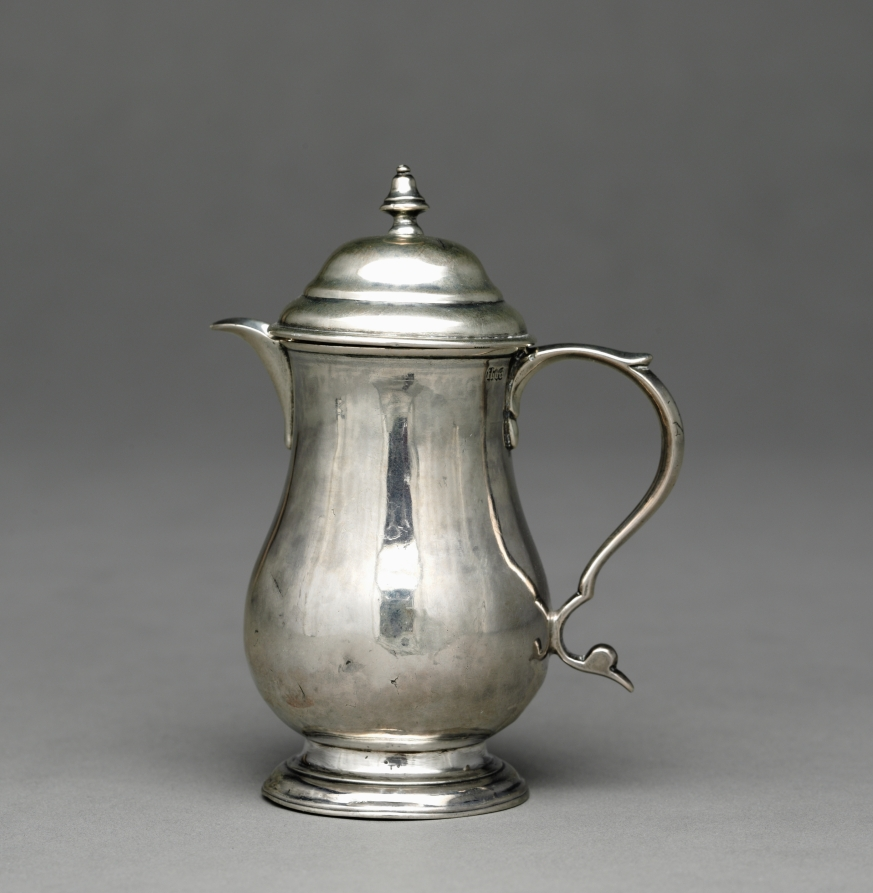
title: Covered Cream Jug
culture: Europe, probably England, 18th century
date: c. 1740–1760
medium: silver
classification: Silver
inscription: engraved "L" over "NM" in block letters on handle, and block letter "L" on bezel of cover. Scratched on bottom: "oz/4" and "dwt/3."